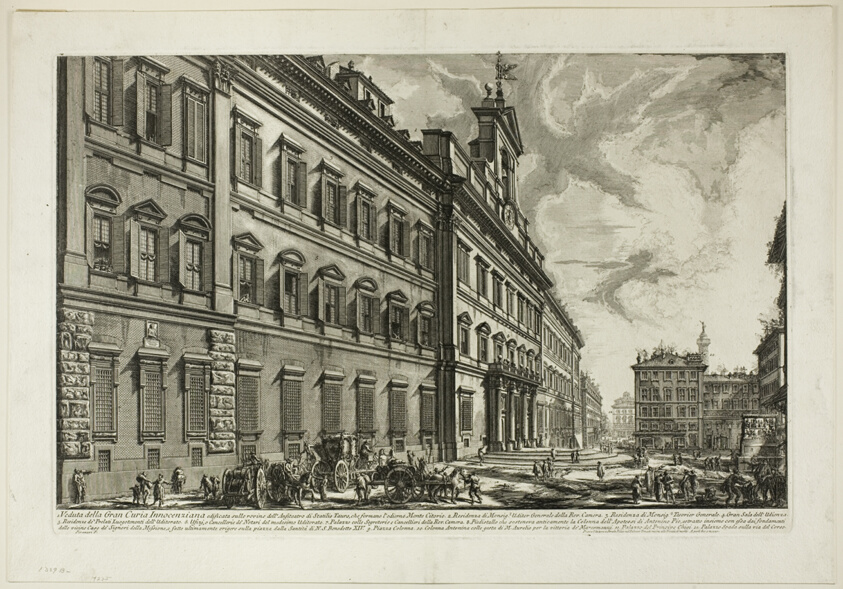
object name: Print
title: View of the Palazzo di Montecitorio, from Views of Rome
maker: Giovanni Battista Piranesi (Italian, 1720-1778)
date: 1750/59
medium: Etching on heavy ivory laid paper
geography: Italy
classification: etching; print; prints and drawing